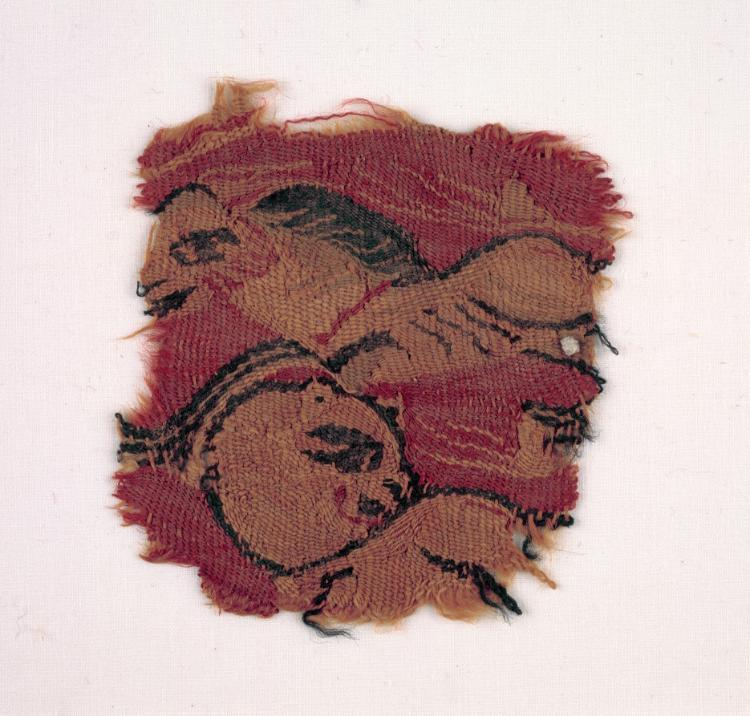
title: Fragment with Two Animals (?)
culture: Egypt, Byzantine period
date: 580 – 599 (?)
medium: tapestry weave: wool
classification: Textile